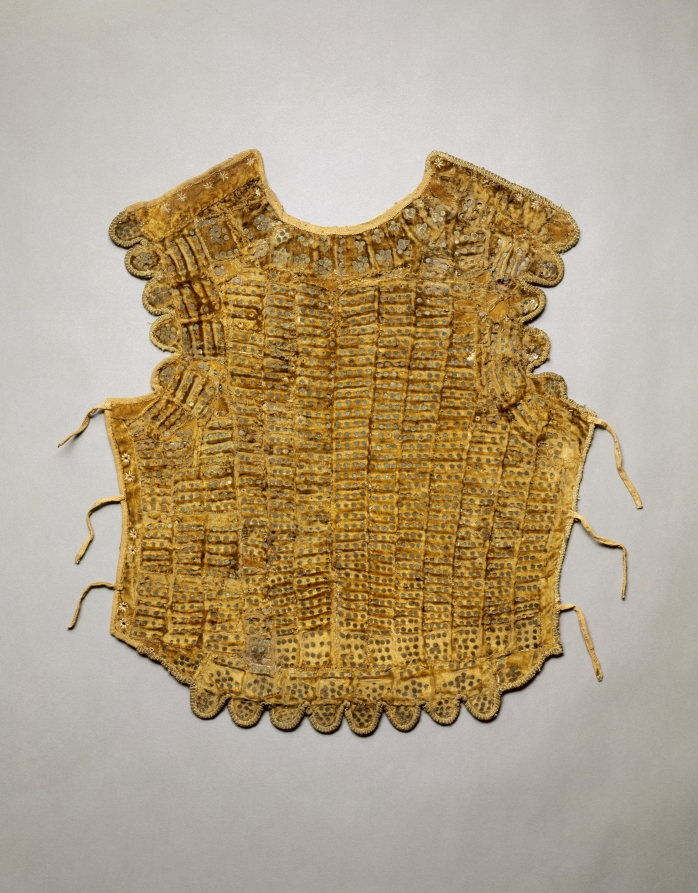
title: Body Guard (Brigandine)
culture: Italy (?), early 16th Century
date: c. 1500–1525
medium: linen; gold velvet; steel; brass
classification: Arms and Armor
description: The brigandine is a light, vest-like body defense popular with both knights and infantry from the 1400s through about 1550. It is constructed of multiple small plates attached to a cloth covering. Finer examples, like this one, are faced in velvet or fabric made of gold thread. The lightweight brigandine provided protection from the weather, and was extremely flexible.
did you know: This vest only weighs about five and a half pounds, considerably lighter than plate armor.